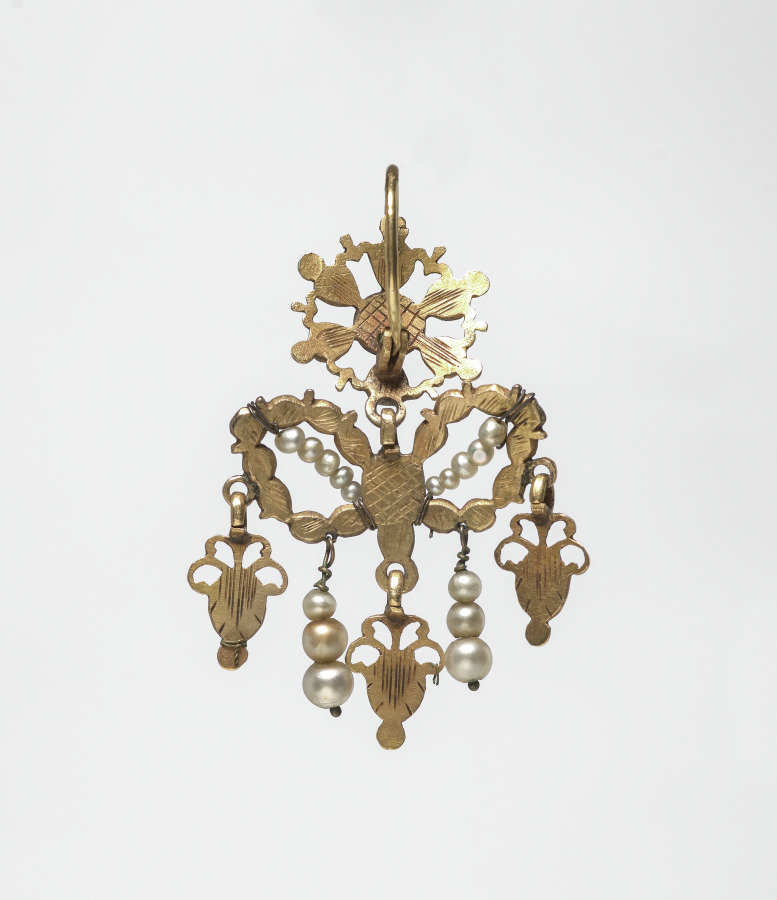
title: Woman's Costume (Earring)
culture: Italy, 19th century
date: 1800s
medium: gold and jewels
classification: Jewelry